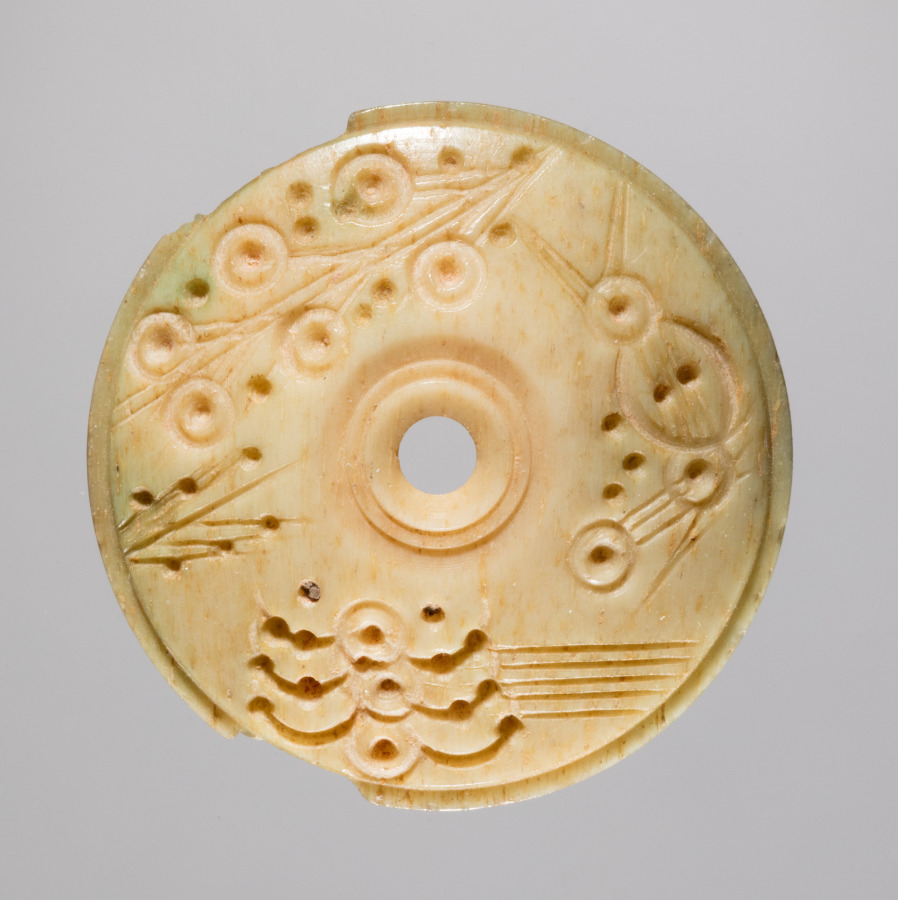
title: Spindle Whorl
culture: Iran, early Islamic period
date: 700s - 900s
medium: bone, incised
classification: Spindle Whorl